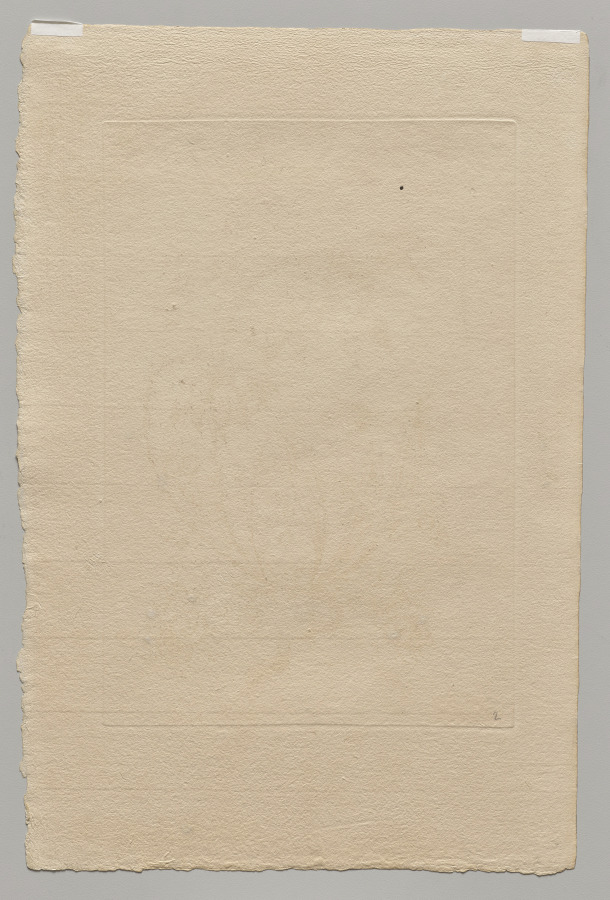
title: Persian Flowers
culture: France, 18th century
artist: Jean Baptiste Pillement (French, 1728–1808)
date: 1755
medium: etching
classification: Print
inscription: Watermark: a partial (lower half) Dovecote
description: Jean Baptiste Pillement was one of the most influential designers of the Rococo period, known for his varied and prolific chinoiseries (European variants of Chinese and Japanese motifs). His designs were spread throughout Europe primarily via their translation into prints. This print is one of a set of six etched by Pillement himself. Each depicts a so-called “Persian” flower, largely fantasies, presenting strange, alienlike floral forms that could be adapted to various uses from textiles to wall decorations.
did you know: The artist Jean Baptiste Pillement was employed by Marie Antoinette to create decorations for her legendary retreat, the Petit Trianon, at Versailles.